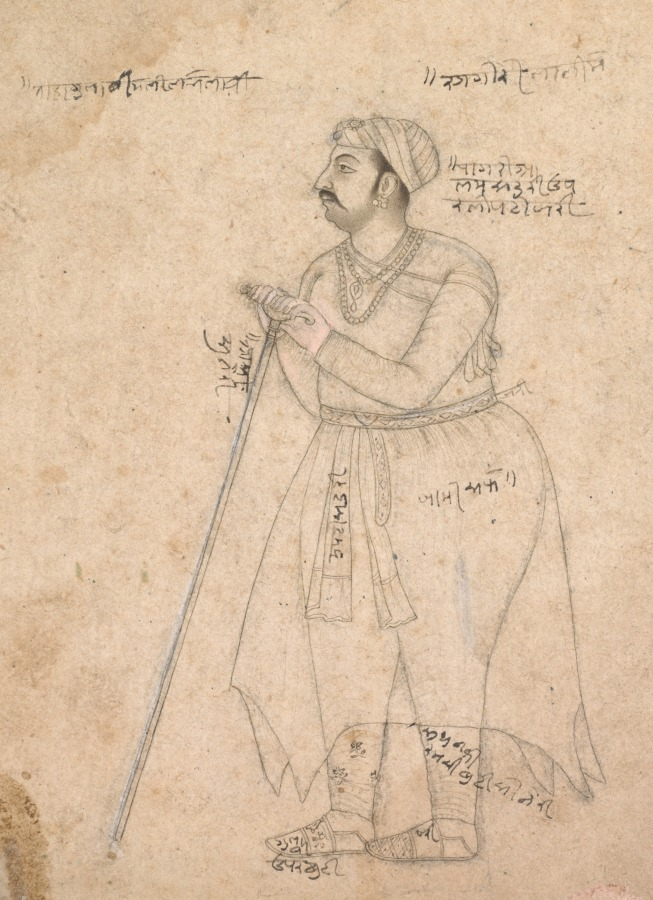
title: Portrait of Maharaja Rai Singh of Bikaner (reigned 1574-1612)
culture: Mughal India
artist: Nur Muhammad (Indian, active c. 1580–1630)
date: c. 1590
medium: Ink and gum tempera on paper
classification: Painting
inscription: Devanagari inscription on the verso reads ‘sri maharaja sri rai singh ji ri sabi chhe’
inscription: Nastaliq inscription on the verso reads ‘dast-i-nur mohammad-bin umar-ud-din’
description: Drawings such as this served as models for formal painted portraits of Mughal and Rajput royalty in court workshops. The confident contour lines, delicate shading, and subtle facial expression are the work of the master artist Nur Muhammad (active 1570s–1630s), identified in a Persian inscription on the back. He came from a distinguished family of artists who settled in Bikaner by the mid-1500s. Nur Muhammad also worked at the Mughal court, notably for the mother of Emperor Akbar (reigned 1565–1605). His descendants continue to be recognized as the master artists of Bikaner up to the present day.